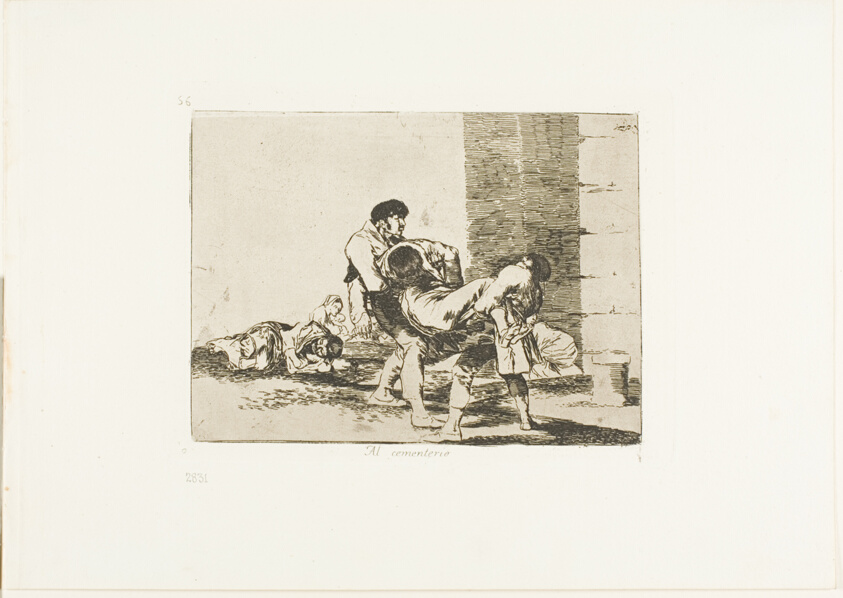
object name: Print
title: To the Cemetery, plate 56 from The Disasters of War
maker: Francisco José de Goya y Lucientes (Spanish, 1746-1828)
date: 1812/15, published 1863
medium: Etching, lavis and drypoint on ivory wove paper with gilt edges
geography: Spain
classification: etching; print; prints and drawing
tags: war